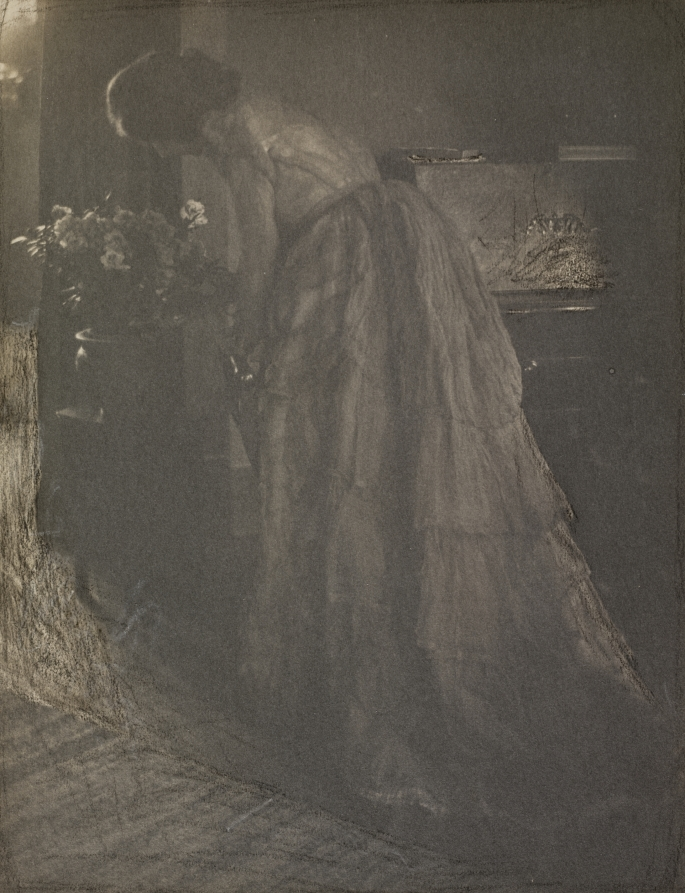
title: The Azalea Plant (Julia Hall McCune)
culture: America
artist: Clarence H. White (American, 1871–1925)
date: c. 1900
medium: platinum print with pencil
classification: Photograph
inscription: Written in pencil on verso: "The Azalea Plant / Portrait of Julia McCune by / Clarence H. White about 1900"